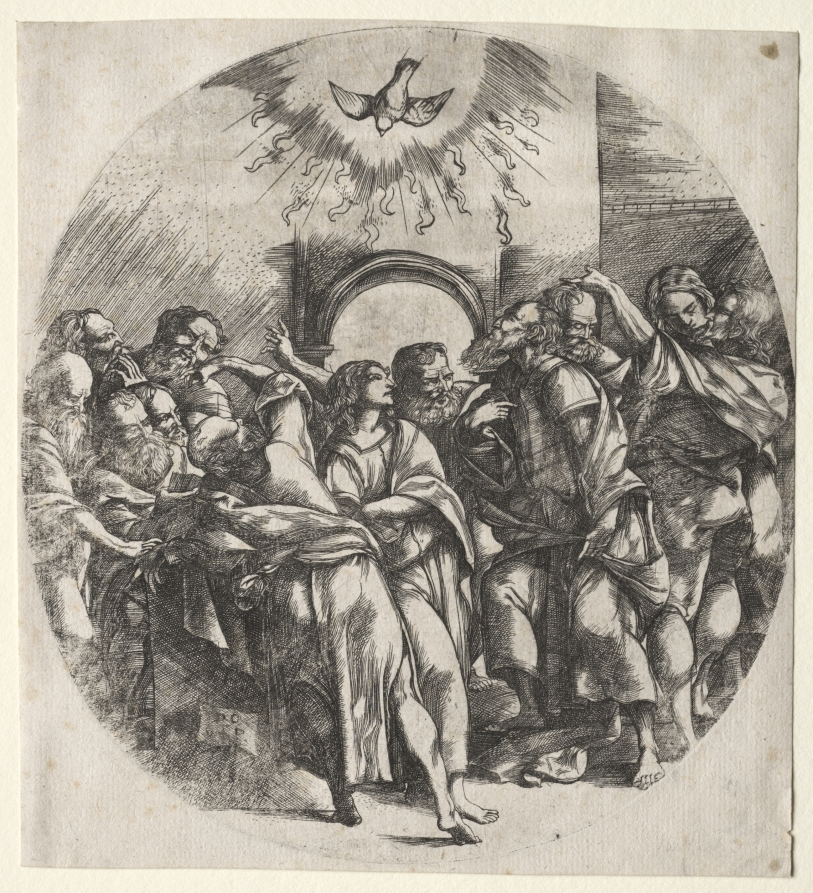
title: The descent of the holy spirit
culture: Italy, 16th century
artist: Domenico Campagnola (Italian, 1500–1564)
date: 1518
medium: engraving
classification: Print